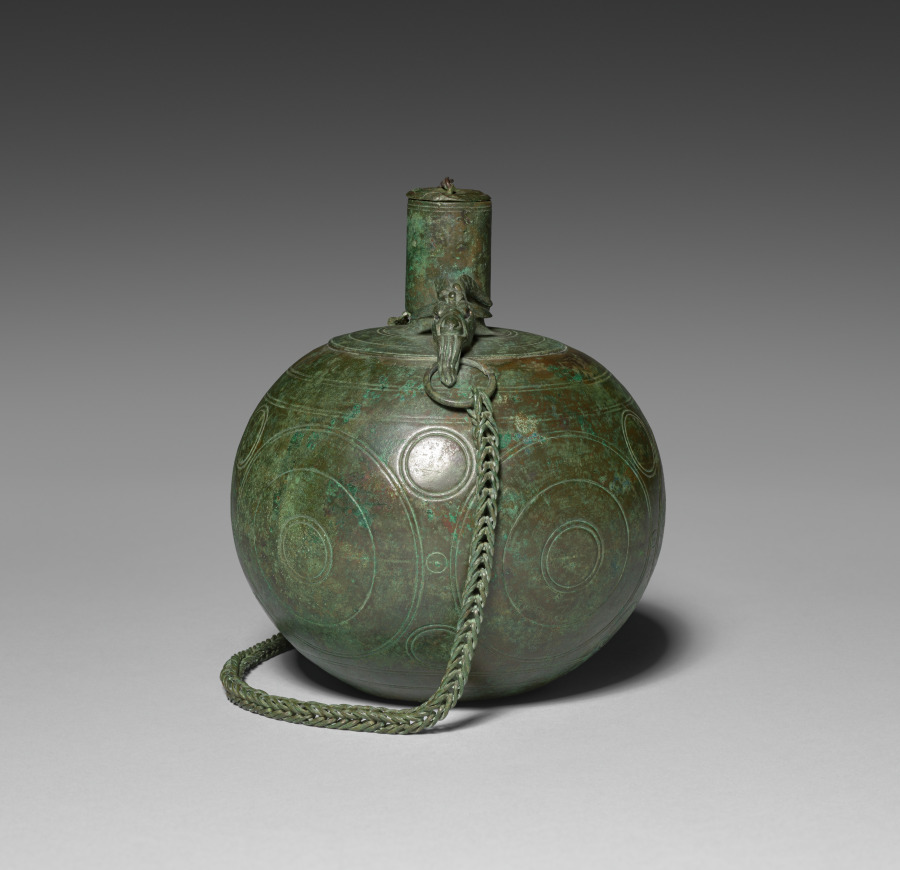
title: Canteen or Balsamarium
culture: Roman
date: 50–250 CE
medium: Bronze, cast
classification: Metalwork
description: A utilitarian container, this nearly spherical cast bronze vessel survives in surprisingly good condition. Two goat heads on the shoulder, each with inlaid silver eyes, serve as decorative attachments, holding two hand-wrought linked chains – a shorter one to secure the stopper and a longer one for hanging or carrying the vessel. The round body of the vessel is nicely complemented by a decorative program of shallowly incised bands and concentric circles.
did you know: The goat heads on the shoulder of this vessel each have inlaid silver eyes.